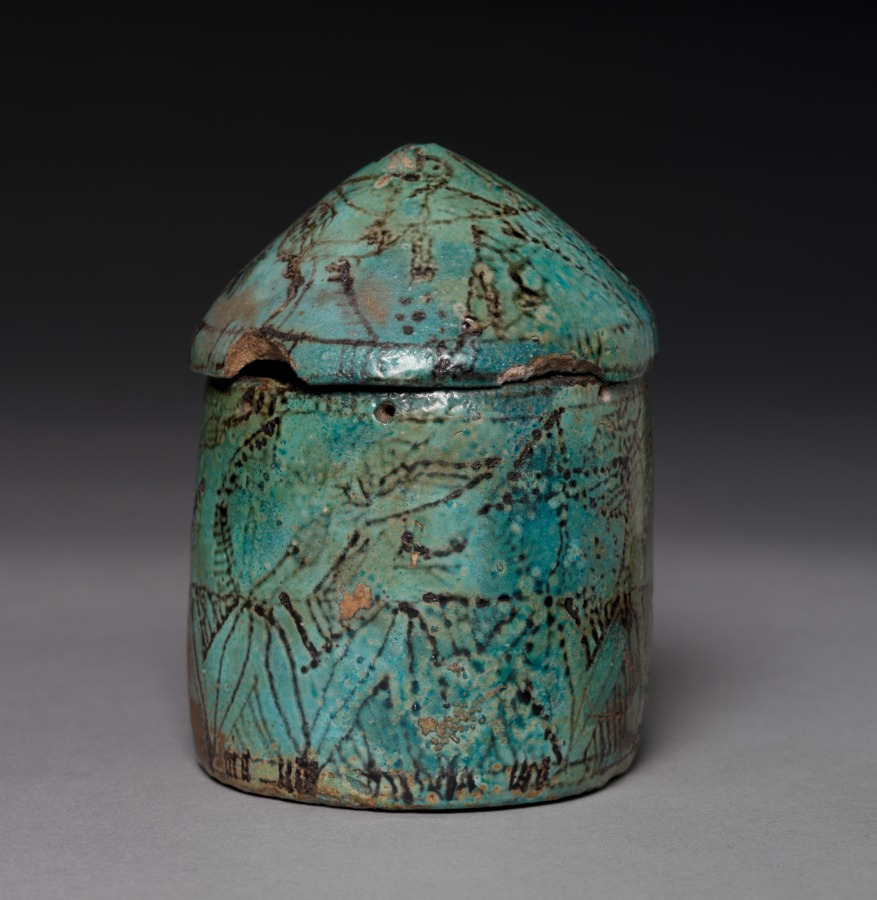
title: Pyxis with Lid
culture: Egypt, Middle Kingdom (2040–1648 BCE)–New Kingdom (1540–1069 BCE)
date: c. 1901–1525 BCE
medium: turquoise faience with black decoration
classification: Vessels